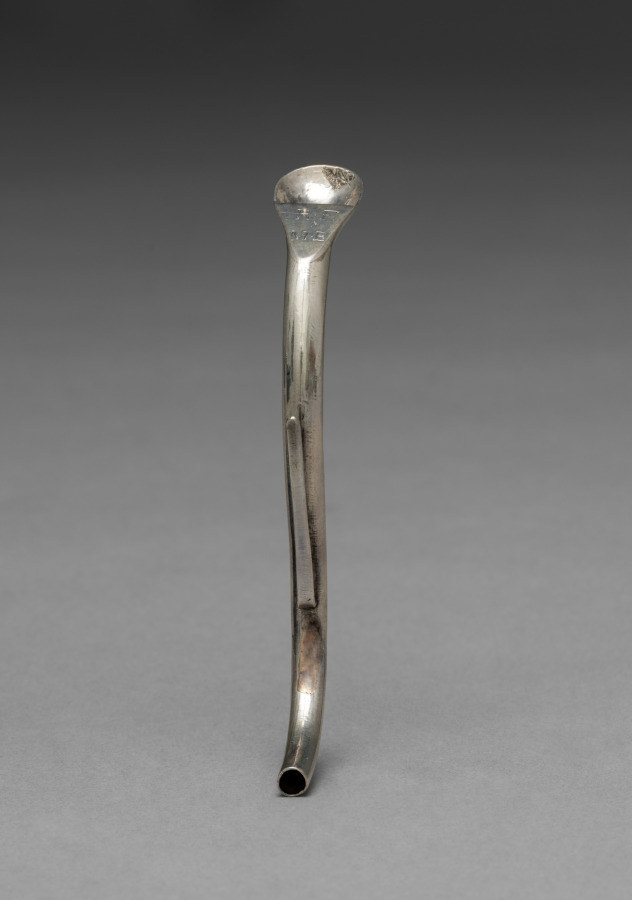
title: Feeding Tube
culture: America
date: 1700s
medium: silver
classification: Silver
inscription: "R.F/to/M.B" in block letters.